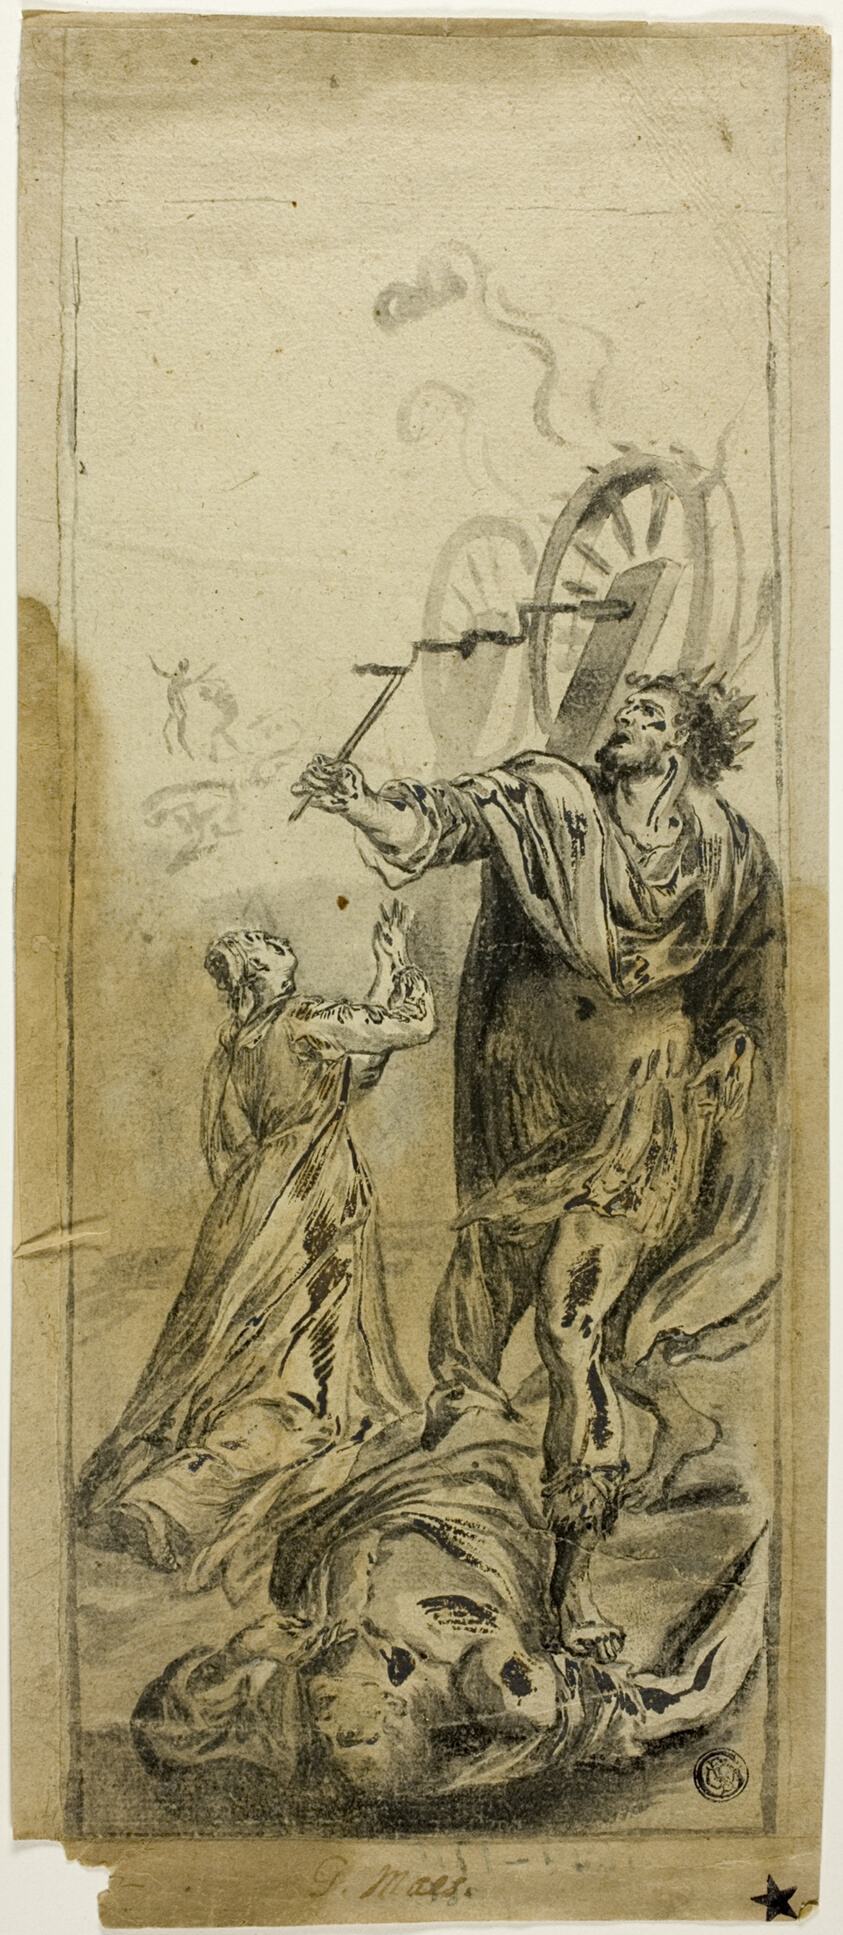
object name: Drawing and Watercolor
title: Martyrdom of Saint Catherine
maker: Attributed to Godfried Maes; Flemish, 1649-1700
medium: Brush and gray wash heightened with lead white (discolored), on buff laid paper, tipped onto buff laid paper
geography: Flanders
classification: pen and ink drawings; drawings (visual works); prints and drawing